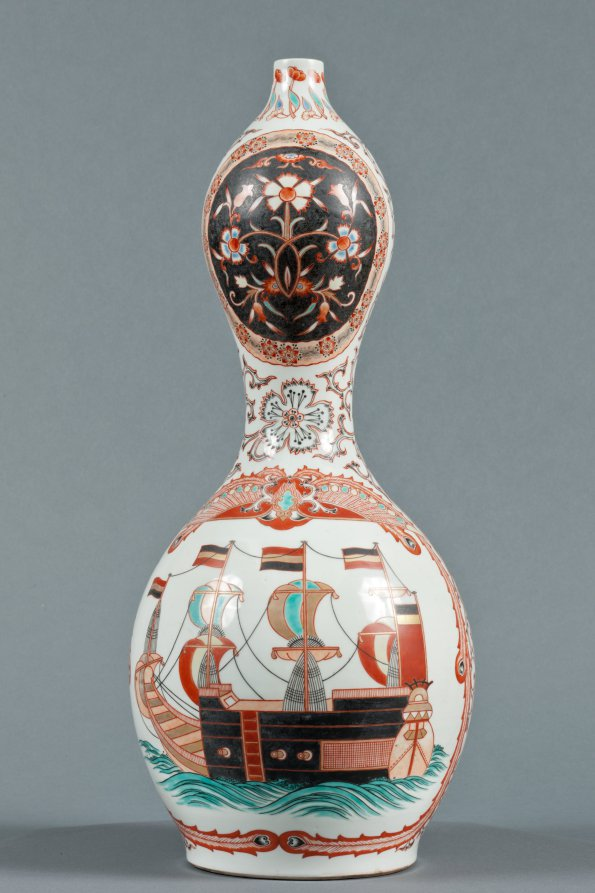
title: Bottle with Western Ships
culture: Japan, Edo period (1615–1868)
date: c. 1800–1868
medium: Porcelain with decoration in colored enamels and underglaze blue, overglaze enamels, and gold (Hizen ware, Arita type)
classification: Ceramic